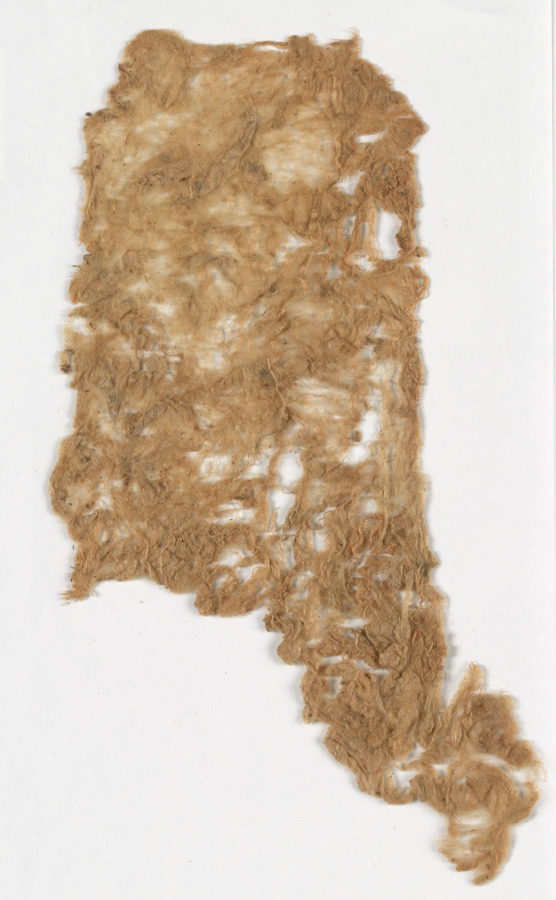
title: Fragment from a Garment (smaller fragment, batting)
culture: China, Liao dynasty (907-1125), 10th century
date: 900s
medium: silk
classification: Textile